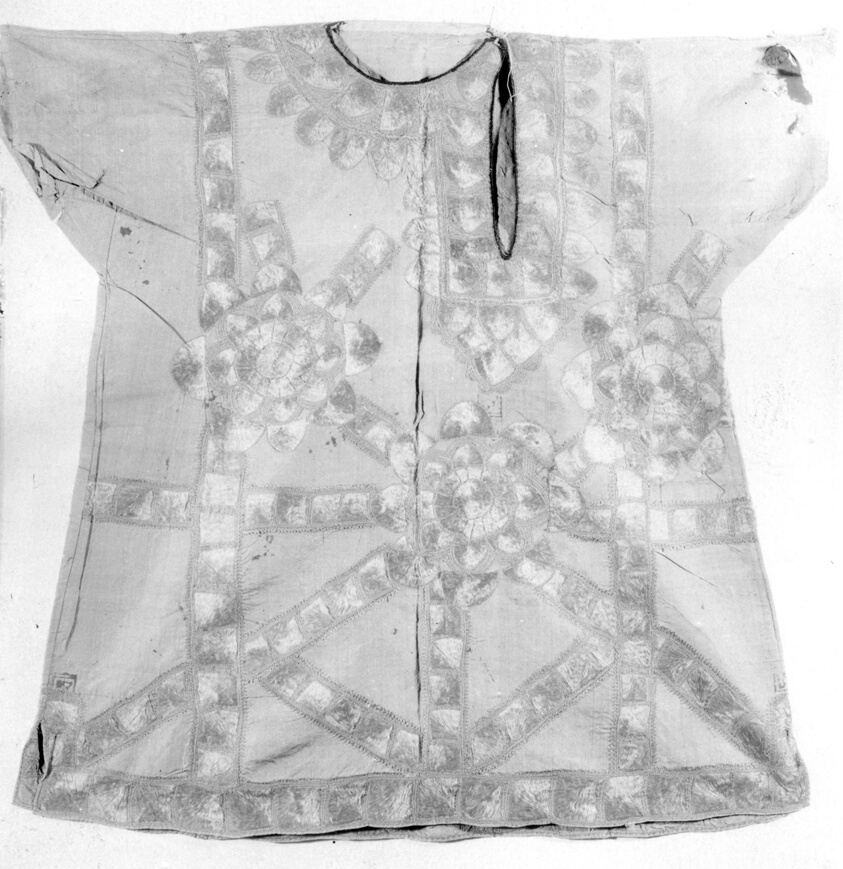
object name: Costume and Accessories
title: Child's Tunic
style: Indian (South Asian), bamana, mande, african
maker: India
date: 19th century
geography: India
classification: textile; needlework (visual works); costume; dress (garment); clothing